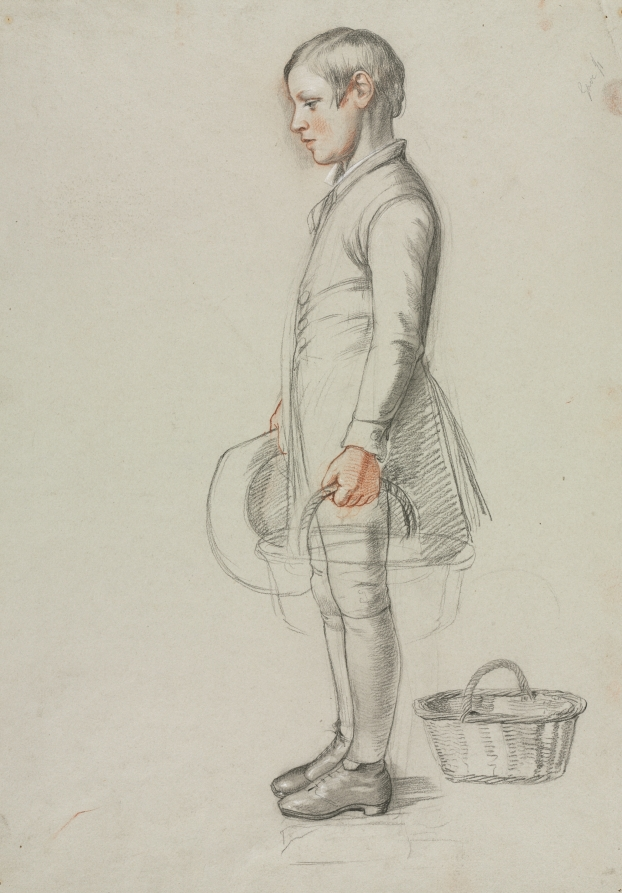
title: Study for "Country Cousins"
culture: England, 19th century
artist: Richard Redgrave (British, 1804–1888)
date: c. 1847–48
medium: black, red, and white chalk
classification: Drawing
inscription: inscribed, in graphite, at upper right: Save 1/1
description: This drawing is a study for Richard Redgrave’s oil painting Country Cousins, a modern life subject in which class conflict is played out in a domestic interior. In the painting, a rural family calls upon their wealthy relations and is met with sneering condescension. The youngest figure in the composition, a country boy in profile with downcast eyes, is the subject of this acutely observed drawing, exquisitely rendered in black and red chalk with white highlights.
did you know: The subject matter of Richard Redgrave's paintings was shaped by his impoverished upbringing, the deaths of his mother and sister, and the burden of responsibility for debt-collecting for his father's precarious manufacturing business.